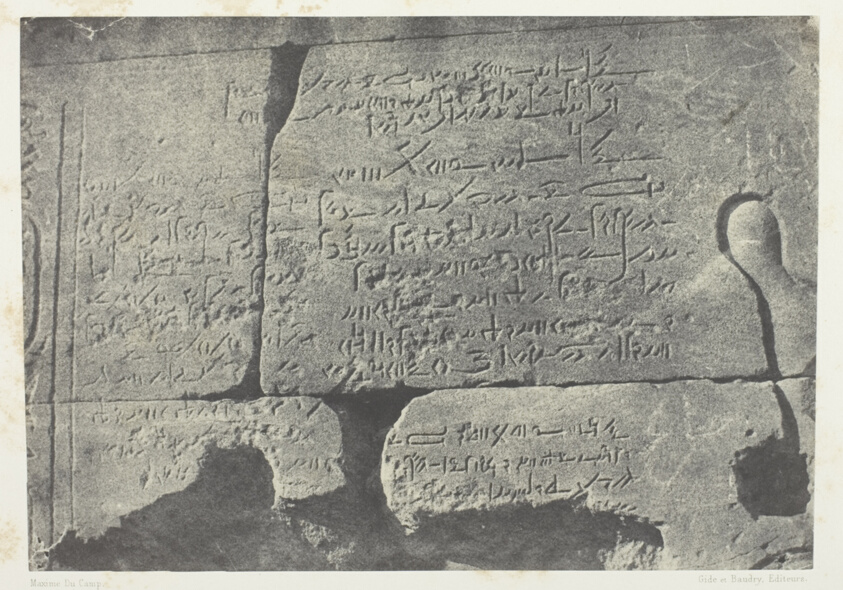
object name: Photograph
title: Inscription Démotique, Grand Temple d'Isis à Philoe; Nubie, plate 77 from the album "Egypte, Nubie, Palestine et Syrie" (1852)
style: 19th century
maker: Maxime Du Camp (French, 1822–1894)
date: 1849/51, printed 1852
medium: Salted paper print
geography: France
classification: salted paper print; photographic process; photography; photograph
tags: Collected by Hugh Edwards, Egypte, Nubie, Palestine et Syrie